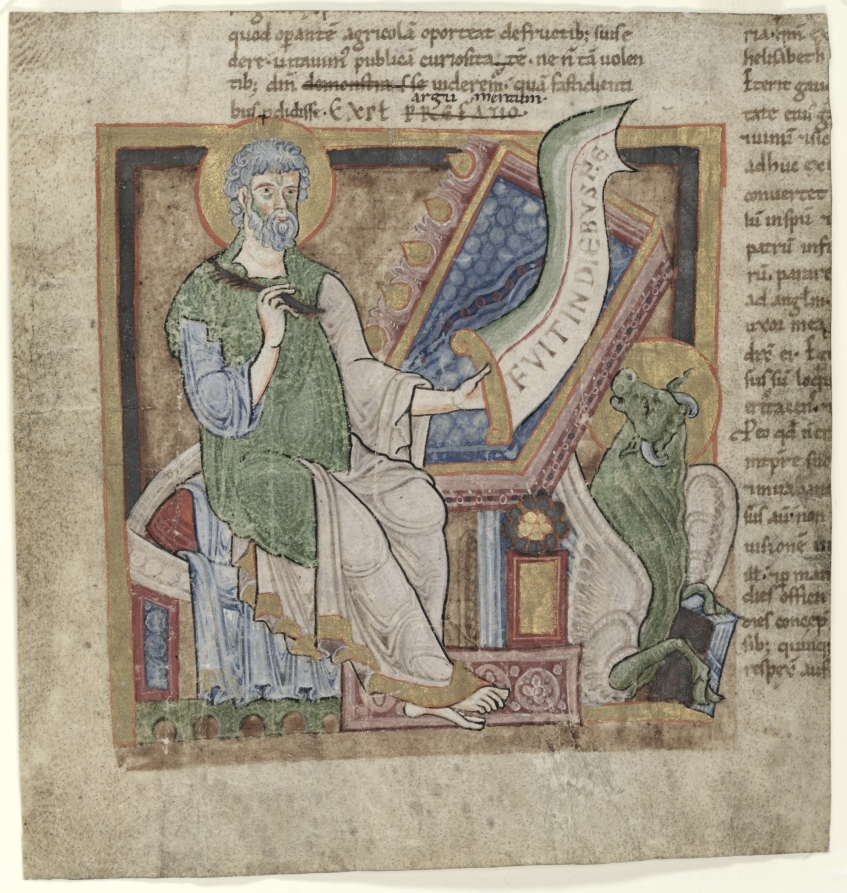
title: Miniature from a Latin Bible: Saint Luke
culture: France, Burgundy, Abbey of Cluny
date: c. 1100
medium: ink, tempera, and gold on vellum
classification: Manuscript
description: Inspired by Byzantine painting, this rare miniature represents the last surviving fragment of a once magnificent bible. The fundamental text of every medieval monastery was the Latin Bible. Monastic bibles at this time were usually large, cumbersome books (commonly in two or three volumes) designed to be recited from a lectern-rather than for private study. This exquisite miniature was excised from such a bible and introduces the beginning of the Gospel of St. Luke. Undoubtedly copied and painted in the scriptorium at Cluny, the bible may have been influenced by a manuscript carried to Cluny from Byzantium, or else may represent the work of an Italian artist working at Cluny but acquainted with Byzantine modes of painting. A large monastery such as Cluny probably had up to a dozen copyists continuously producing such manuscripts. A surviving 12th-century booklist records that Cluny possessed some 570 volumes, a large number for the time.